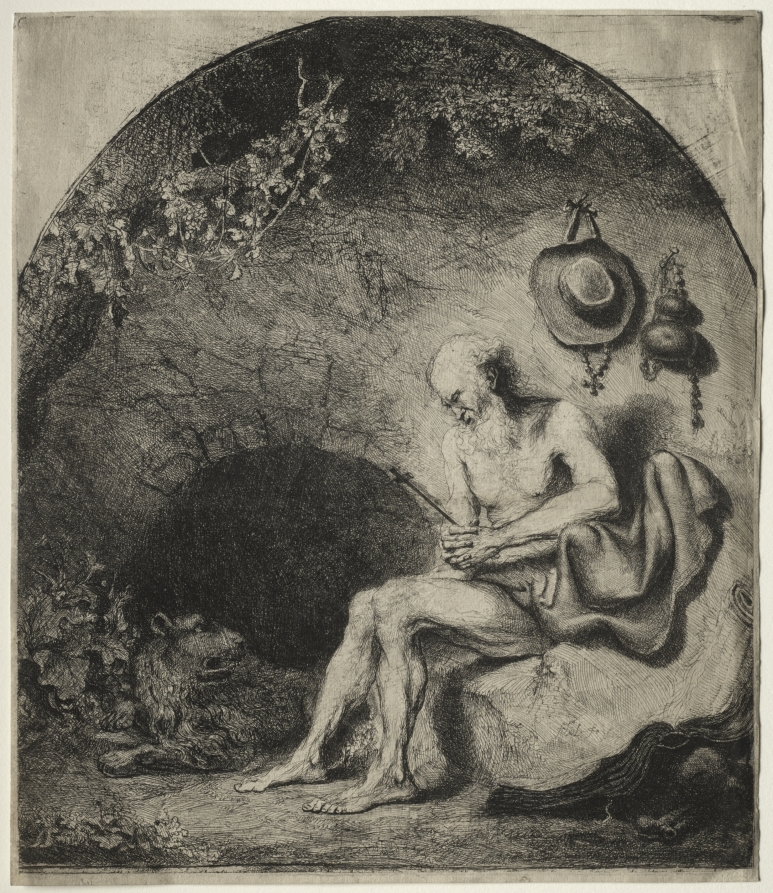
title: St. Jerome in Penitence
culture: Netherlands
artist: Ferdinand Bol (Dutch, 1616–1680)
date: 1644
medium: etching and drypoint with granular bitten tone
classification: Print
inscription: lower right, in plate: f bol. fe 1644 ; VERSO, lower left, in graphite: urvc ; lower left, in graphite (erased): 23067/[U2?] ; lower left, in graphite: B. 3. ; lower center, in graphite: A[o?] Hollst 3 I/III ; lower right, in graphite: f. Bol fec. ; lower right, in graphite: $600 ; lower right, in graphite: LAS.